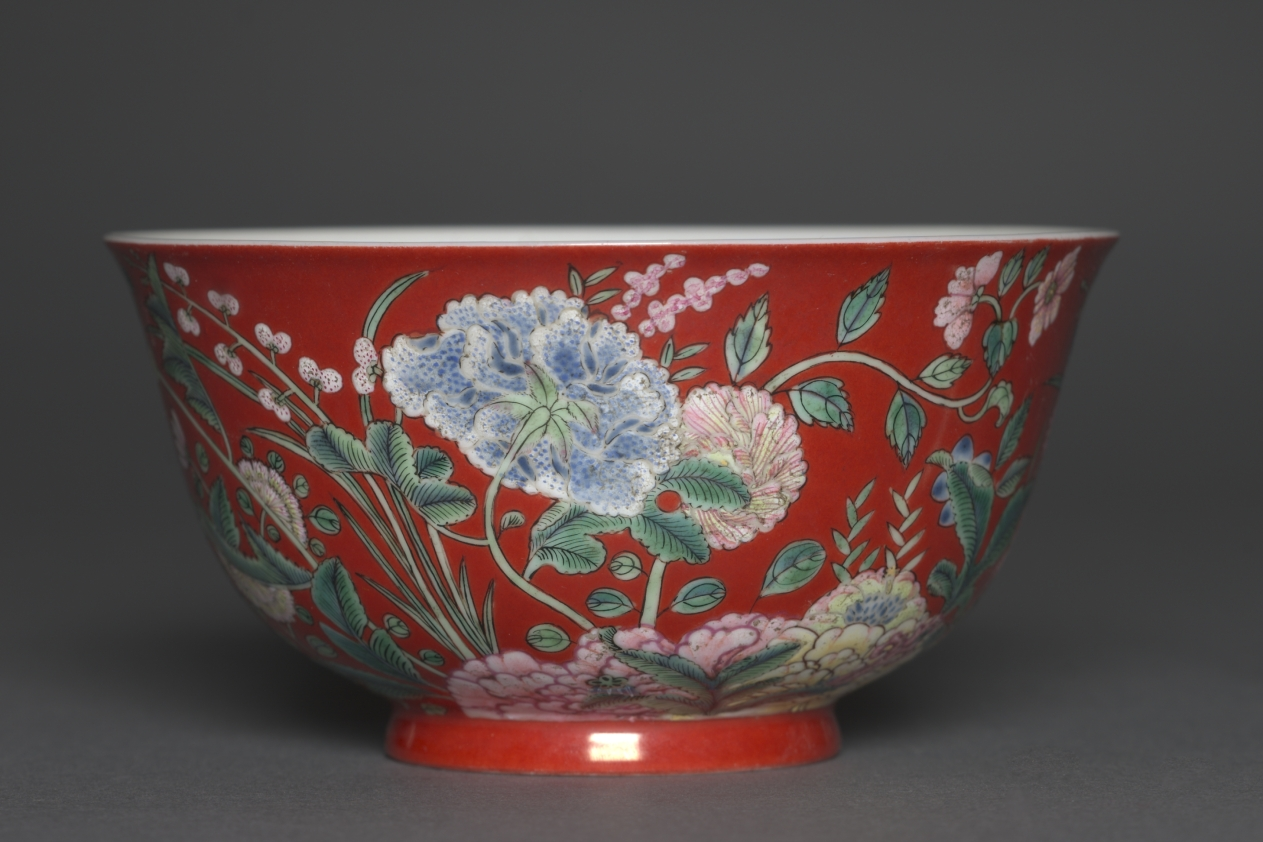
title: Bowl with Flowering Plants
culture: China, Jiangxi province, Jingdezhen, Qing dynasty (1644–1911), Yongzheng mark and reign (1723–35)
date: 1723–35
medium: porcelain with overglaze enamel decoration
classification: Ceramic